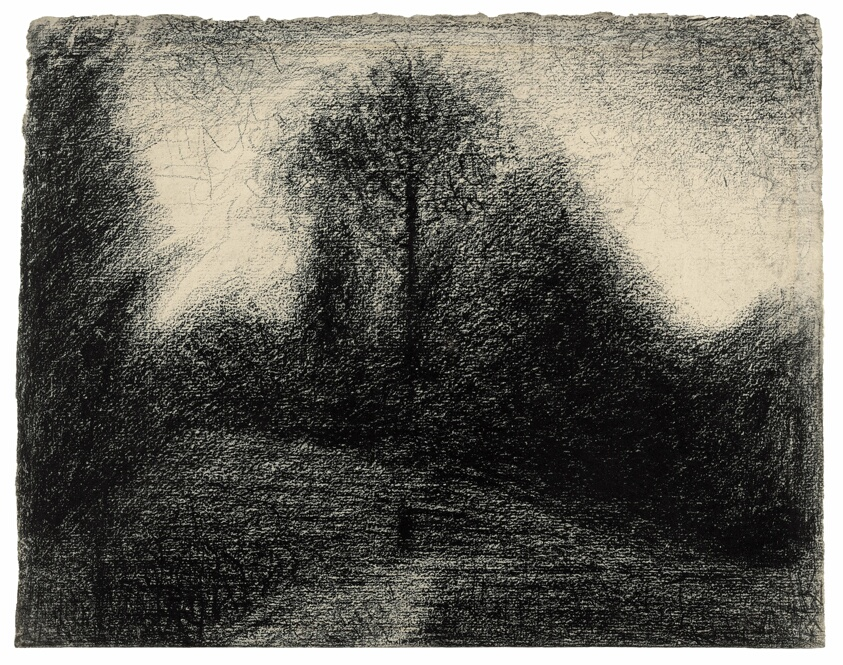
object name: Drawing and Watercolor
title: Landscape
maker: Georges Seurat (French, 1859–1891)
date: c. 1881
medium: Black Conté crayon on off-white laid paper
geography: France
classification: drawings (visual works); conté crayon; paper; prints and drawing